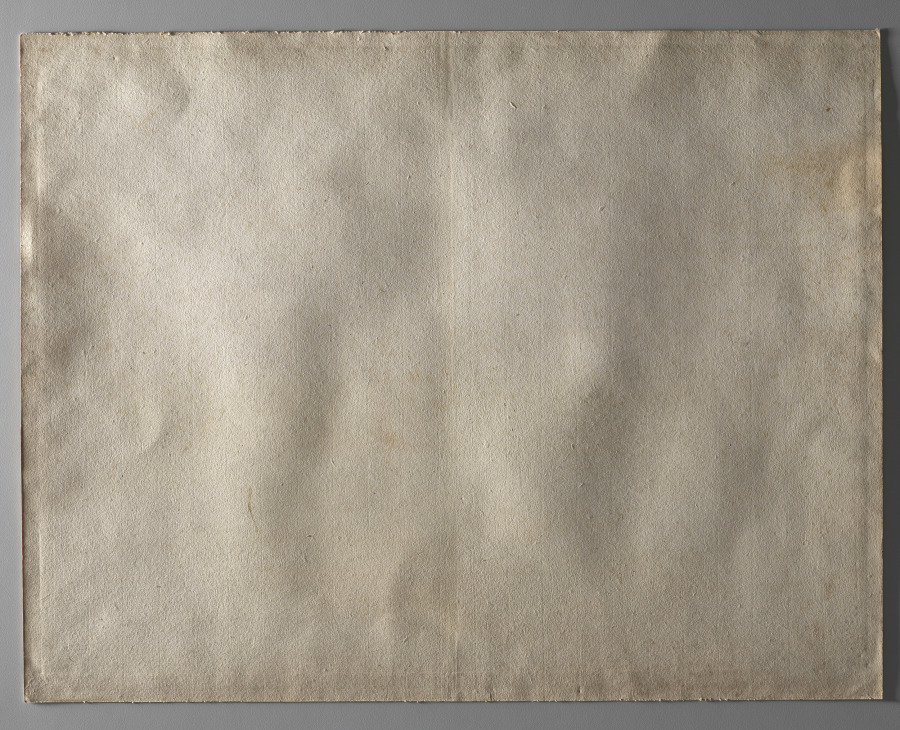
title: A View of the Ruins of the Baths of Caracalla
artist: Giovanni Battista Lusieri (Italian, 1750–1825)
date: 1779–81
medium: graphite, pen and black ink, watercolor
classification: Drawing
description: Lusieri was known among his Grand Tour patrons for his meticulous technique and his originality: for example, his choice of an unusual view of the Baths of Caracalla, as here, taken from within the ancient site. With an astonishing commitment to the truthful depiction of nature and ruins, and an extreme awareness of the nuances of light at different times of day, he depicted the ruins in the late afternoon. The presence of figures emphasizes the massive scale of the ruins in the warm Italian sun in this significantly large, impressive sheet, a welcome souvenir to his patron, an English Lord, when he returned to England.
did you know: The artist Lusieri accompanied the British Lord Elgin to Athens in the late 1790s and participated in the dismantling of the Parthenon’s metope sculptures there, now famously called the Elgin marbles.